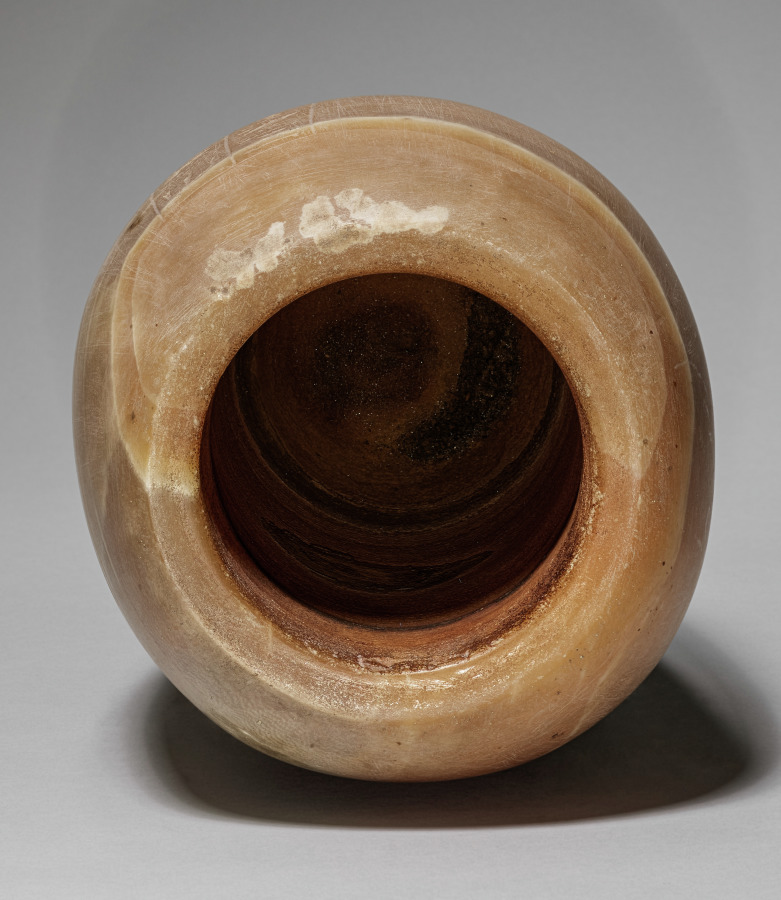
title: Canopic Jar with Man's Head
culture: Egypt, Late period (715–332 BCE), Dynasty 26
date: 664–525 BCE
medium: travertine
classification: Funerary Equipment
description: In the process of mummification, the liver, lungs, stomach, and intestines were removed, separately embalmed, and stored in specialized jars known as canopic jars (after a sailor in Greek mythology, who died at the town of Canopus in the Nile Delta and was worshipped there in the form of a human-headed jar). Each organ was identified with one of four funerary deities collectively known as the Sons of Horus: the liver with Imsety (man's head), the lungs with Hapy (baboon's head), the stomach with Duamutef (jackal's head), and the intestines with Qebehsenuef (falcon's head). It was their duty to protect the deceased and restore to him his body parts in the hereafter.